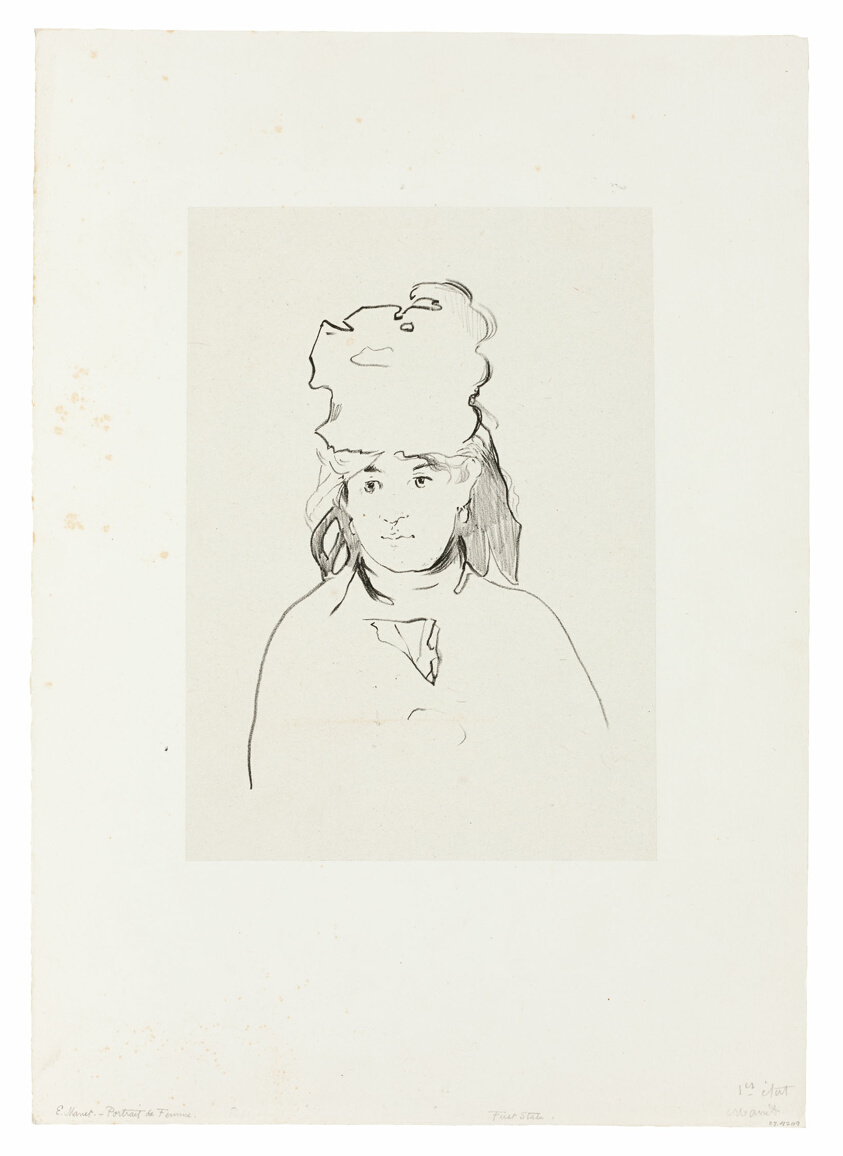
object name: Print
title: Berthe Morisot in Silhouette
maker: Édouard Manet (French, 1832-1883)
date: 1872–74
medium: Lithograph in black on chine, laid down on ivory wove paper (chine collé)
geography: France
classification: lithograph; print; prints and drawing